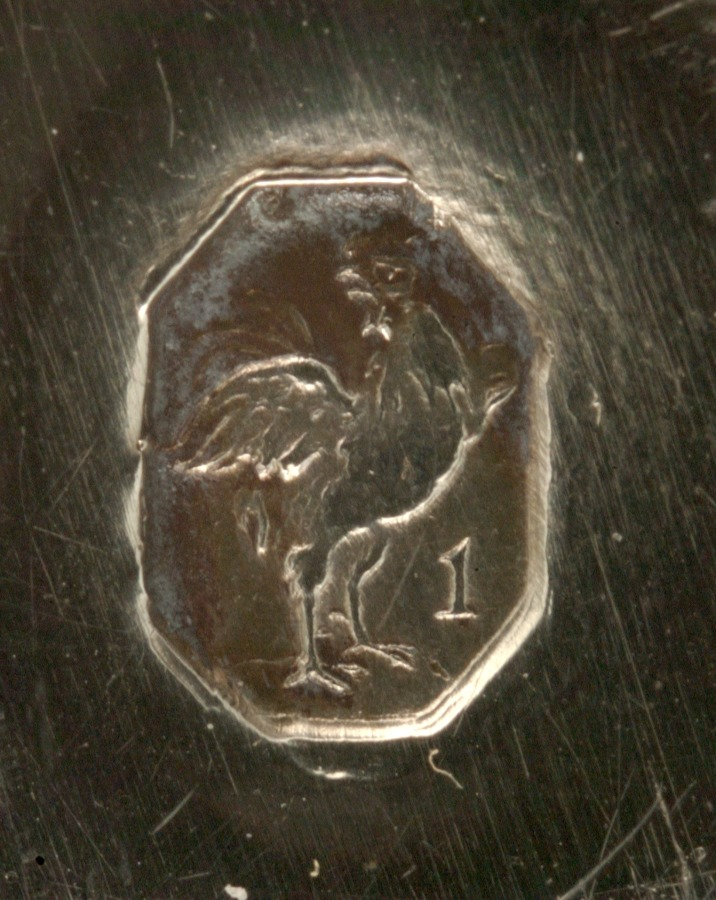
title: Covered Tureen on Stand (Pot à oille)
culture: France, late 18th-early 19th Century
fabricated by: Henry Auguste (French, 1759–1816)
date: 1797–98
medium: silver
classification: Silver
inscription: [Coat-of-arms of Amoral don Federico Carlos Gravina on bowl; cover; stand]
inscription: [Assay mark for large-sized work, 1798-1809, lining exterior; tureen foot exterior]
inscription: [Assay mark for medium-sized work, 1798-1809, beneath stand foot; on edge of cover]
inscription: [Maker's mark of Henri Auguste, master silversmith in 1785, beneath tureen foot; beneath stand foot; inside stand foot edge]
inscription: [Official assay mark for first standard silver, Paris, 1798-1809, beneath stand foot; lining exterior; on cover]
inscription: [Official mark for silver imported from countries with customs conventions, 1838-1912, beneath stand foot; edge of cover; tureen lip exterior; lining exterior; on one tureen handle; outside stand foot; tureen foot exterior]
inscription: [Unknown mark, possibly Ceres' profile in square with "E" and "7", beneath stand foot; on cover; rim of lining; tureen foot exterior; tureen lip exterior]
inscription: [Unofficial assay mark for first standard silver, Paris, 1794-1797, beneath foot stand; beneath tureen foot; near tureen handle exterior]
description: This pot-à-oille was designed by master goldsmith Henri Auguste after drawings by draftsman and sculptor Jean Guillaume Moitte. Though many of the neoclassical decorative elements on this piece are pulled from Moitte’s design, Auguste’s final product leaves out much of the proposed ornamentation. Instead this object finds distinction in its large size and smooth expanses of silver that emphasize the purity of its lines.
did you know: The coat of arms on the body of the work corresponds to the family of Federico Carlos Gravina, a Sicilian-Spanish admiral who was known to have had a close diplomatic relationship with Napoleon I.